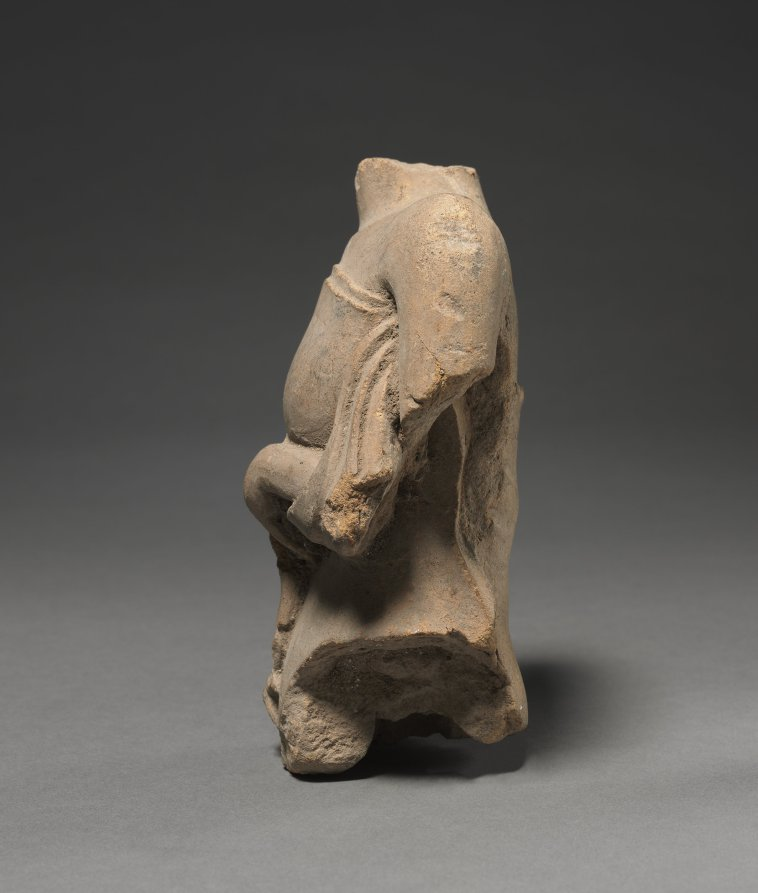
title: Female Torso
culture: Eastern Java, Majapahit Dynasty (1293-1478)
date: Majapahit Dynasty (1293–1478)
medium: terracotta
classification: Sculpture